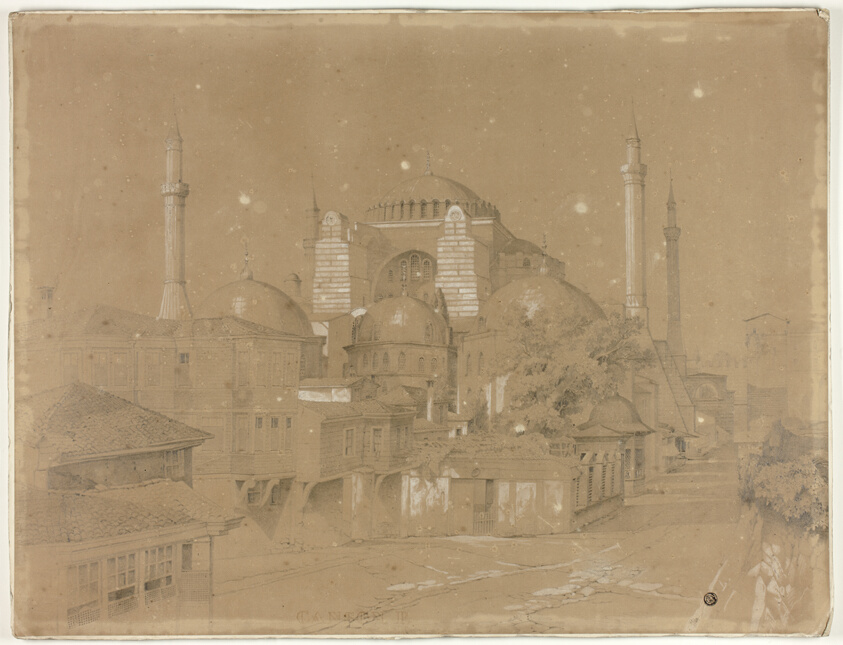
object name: Drawing and Watercolor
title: View of Constantinople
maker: Possibly David Roberts; Scottish, 1796-1864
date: 1840/45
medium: Graphite, heightened with lead white (discolored), on dark tan wove paper, laid down on ivory board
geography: Scotland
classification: graphite; paper; drawings (visual works); prints and drawing